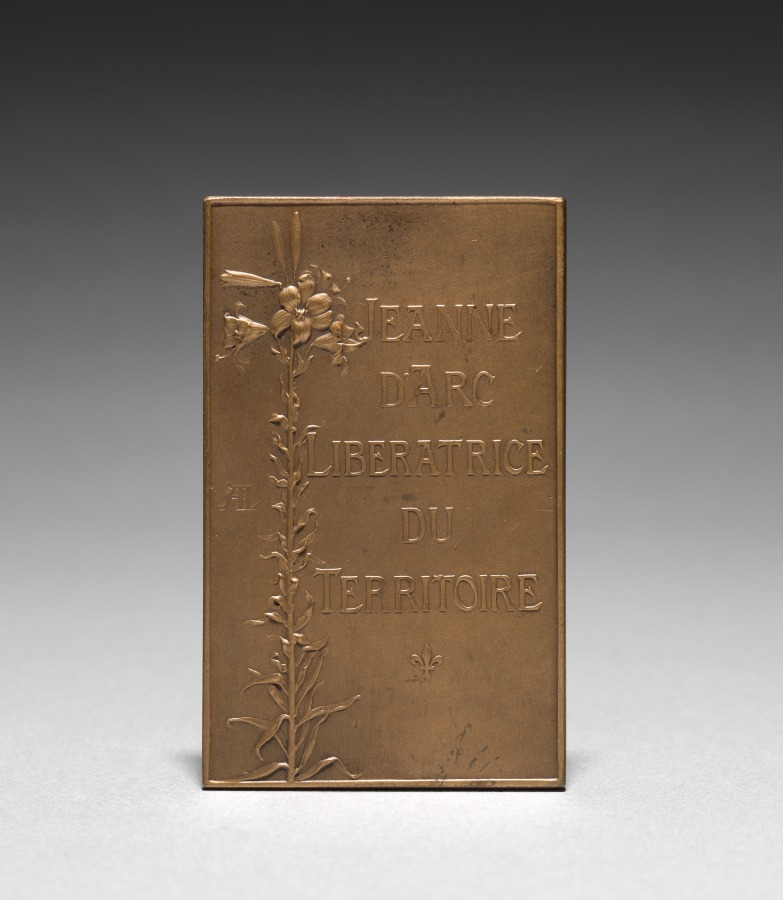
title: Medallion: Jeanne d'Arc (reverse)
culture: France, 19th century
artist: Daniel Dupuis (French, 1819–1899)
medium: bronze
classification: Metalwork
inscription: "Jeanne d'Arc Liberatrice du Territoire."